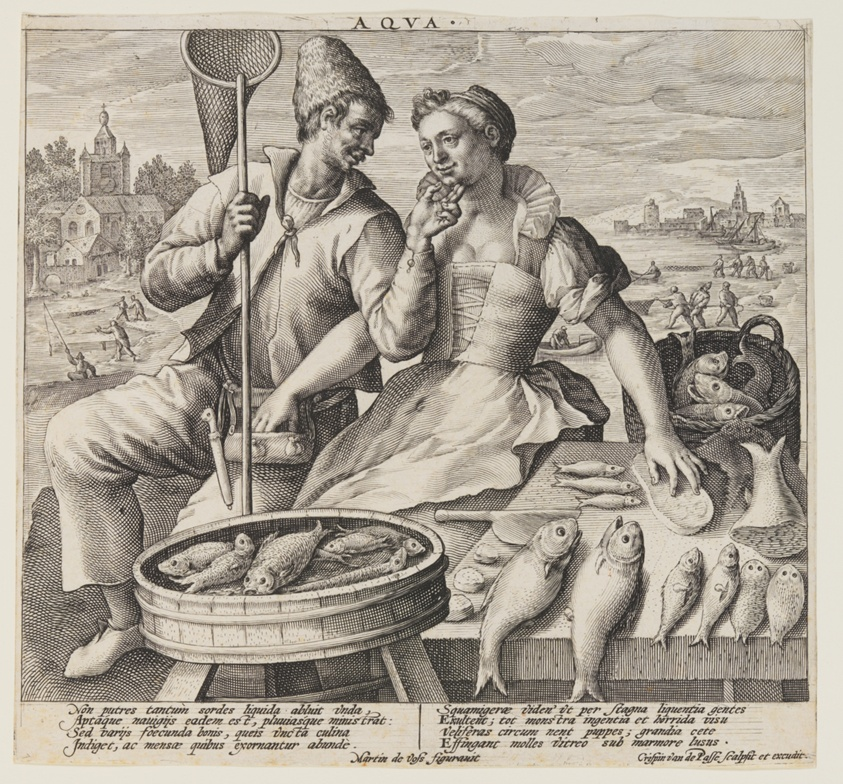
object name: Print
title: Aqua (Water), from The Elements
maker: Crispijn van de Passe I (Dutch, c. 1565–1637); after Maerten de Vos Maarten de Vos (Flemish, 1532–1603)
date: c. 1600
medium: Engraving on ivory laid paper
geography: Netherlands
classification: engraving; paper; print; prints and drawing